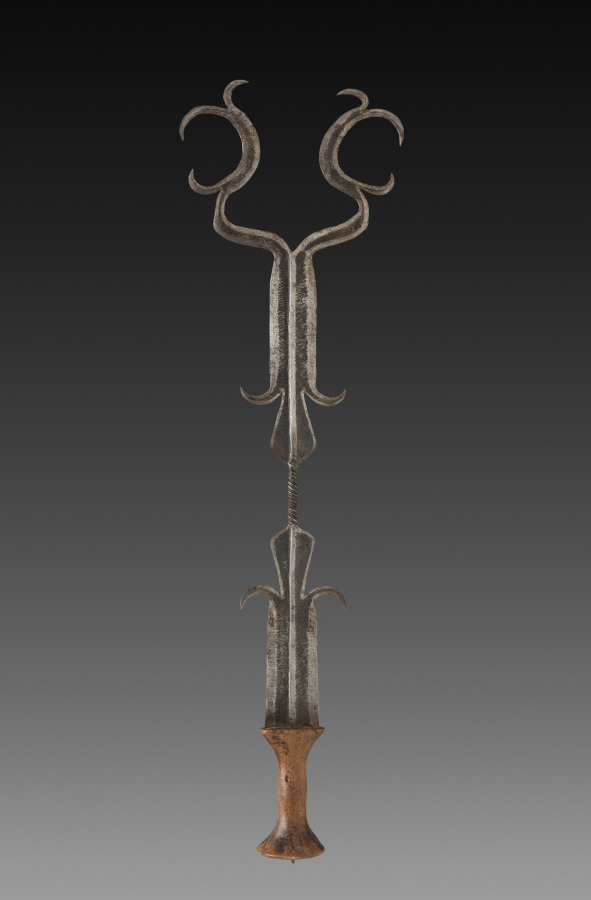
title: Sword (byongi)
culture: Africa, Central Africa, Democratic Republic of Congo, Ekonda-style or Kundu-style maker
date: late 1800s to early 1900s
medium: Iron alloy and wood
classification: Arms and Armor